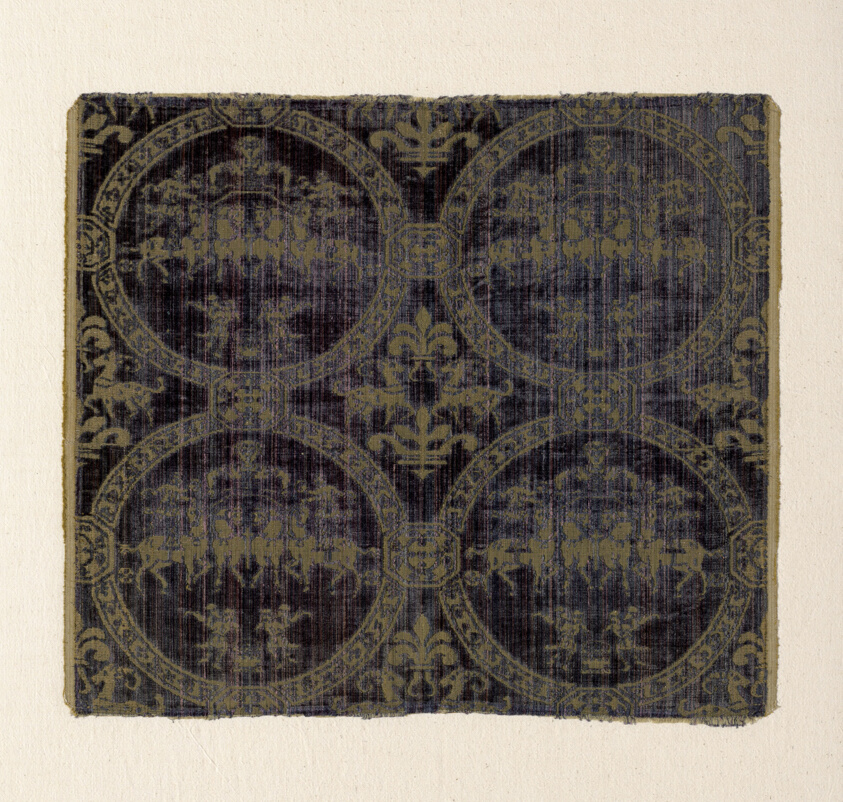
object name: Textile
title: Panel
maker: France or Italy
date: 19th century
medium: Silk and cotton, plain weave with gilt-metal strip supplementary facing wefts and two-color supplementary pile warps forming cut voided velvet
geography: Italy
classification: textile; weaving - velvet